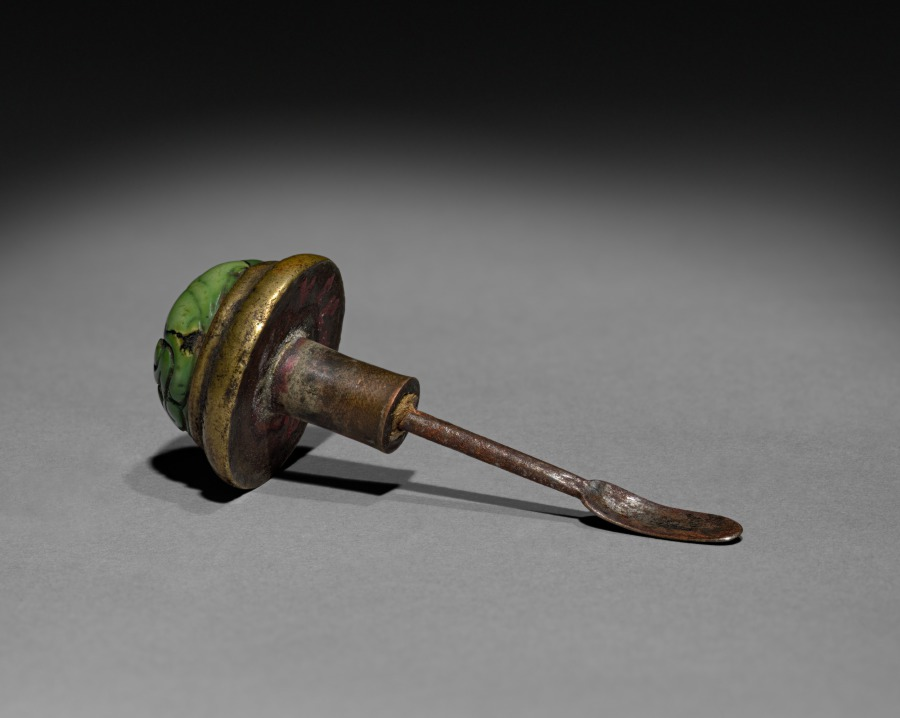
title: Snuff Bottle (stopper)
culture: China, Qing dynasty (1644-1911)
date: 1644–1911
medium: glass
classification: Glass